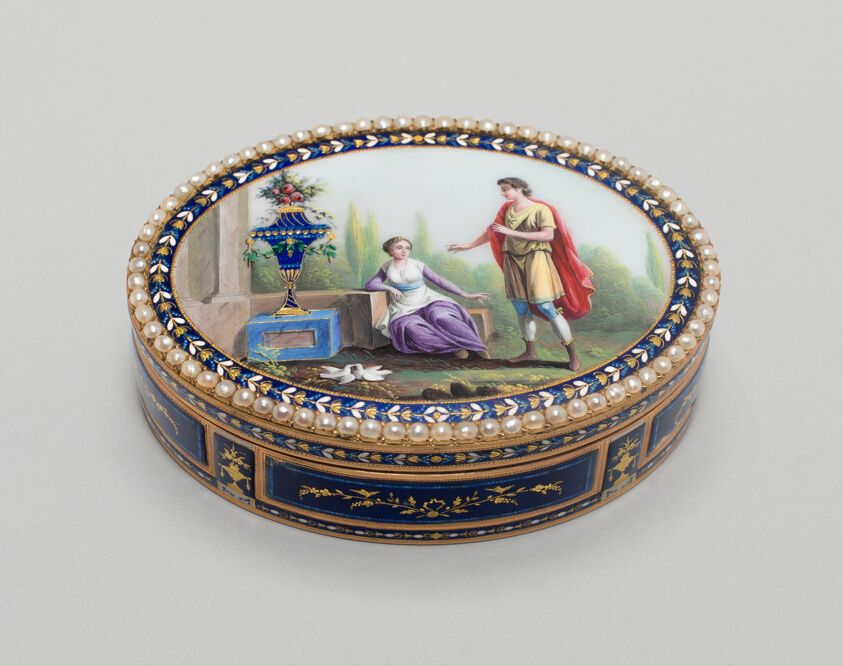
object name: Metalwork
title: Snuff Box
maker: Geneva, Switzerland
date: Late 18th century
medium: Gold, enamel, and pearls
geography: Switzerland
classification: snuff box; european decorative arts; metalwork